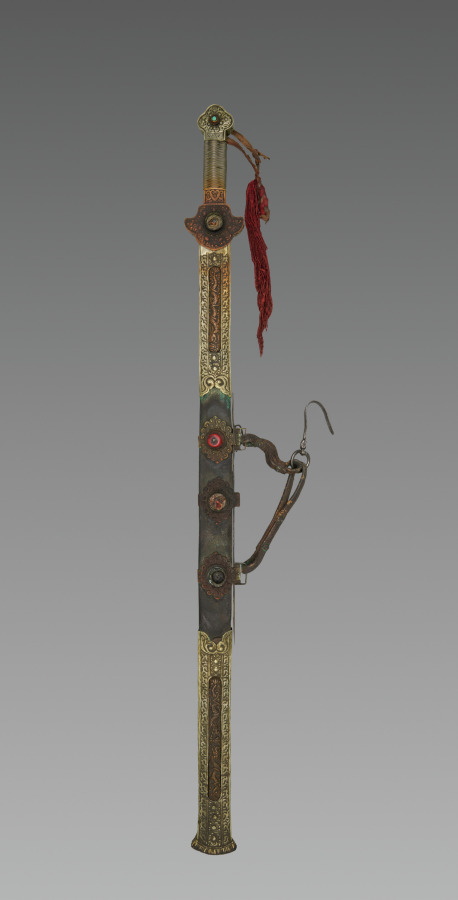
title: Sword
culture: Eastern Tibet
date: 1800s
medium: iron and silver with bone, turquoise, leather and brass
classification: Arms and Armor